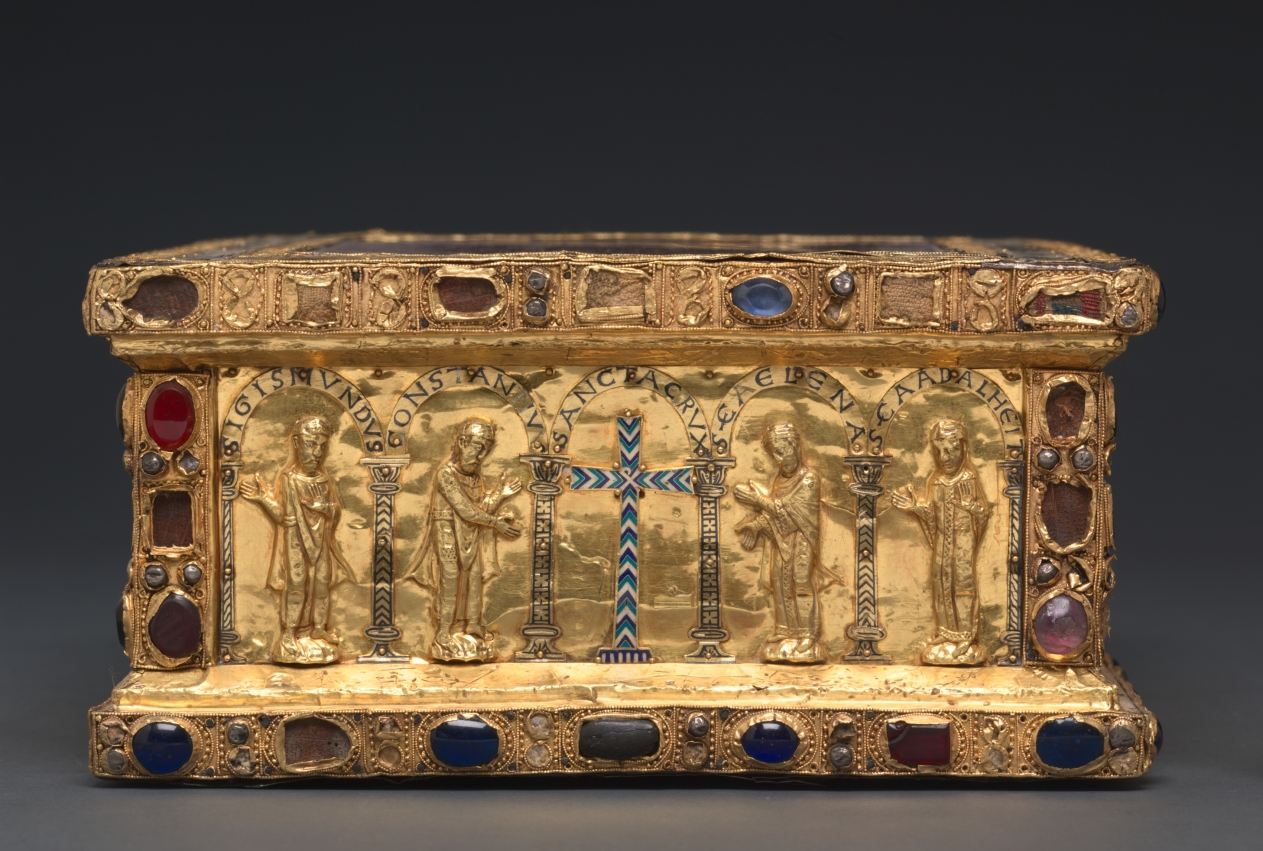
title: Portable Altar of Countess Gertrude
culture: Germany, Lower Saxony?, Romanesque period, 11th century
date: c. 1045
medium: gold, cloisonné enamel, porphyry, gems, pearls, niello, wood core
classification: Metalwork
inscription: GERDRVDIS XPO FELIX VT | VIVAT IN IPSO OBTVLIT HVNC LAPIDEM GEMMIS | AVROQ NITENTEM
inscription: SIGISMVNDVS, CONSTANTIVS, SANCTA CRVX, SCA ELENA, SCA ADALHEIT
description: Commissioned by Countess Gertrude of Brunswick, this portable altar is one of the Guelph Treasure’s earliest and most sumptuous objects. The choice of white-speckled porphyry as the altar stone signals Gertrude’s worldly aspirations; an imperial color since classical antiquity, porphyry was only used by the imperial family. Historical figures of royal and imperial rank are depicted with Christ, the Virgin, apostles, and archangels along the altar’s sides, stressing the countess’s political ambitions and claim of imperial lineage for her own dynasty. The Latin inscription surrounding the altar stone reads, "Gertrude offers to Christ, to live joyfully in him, this stone that glistens with gems and gold."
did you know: On the bottom of this altar is a trap door that opened to reveal small relics of saints wrapped in silk.